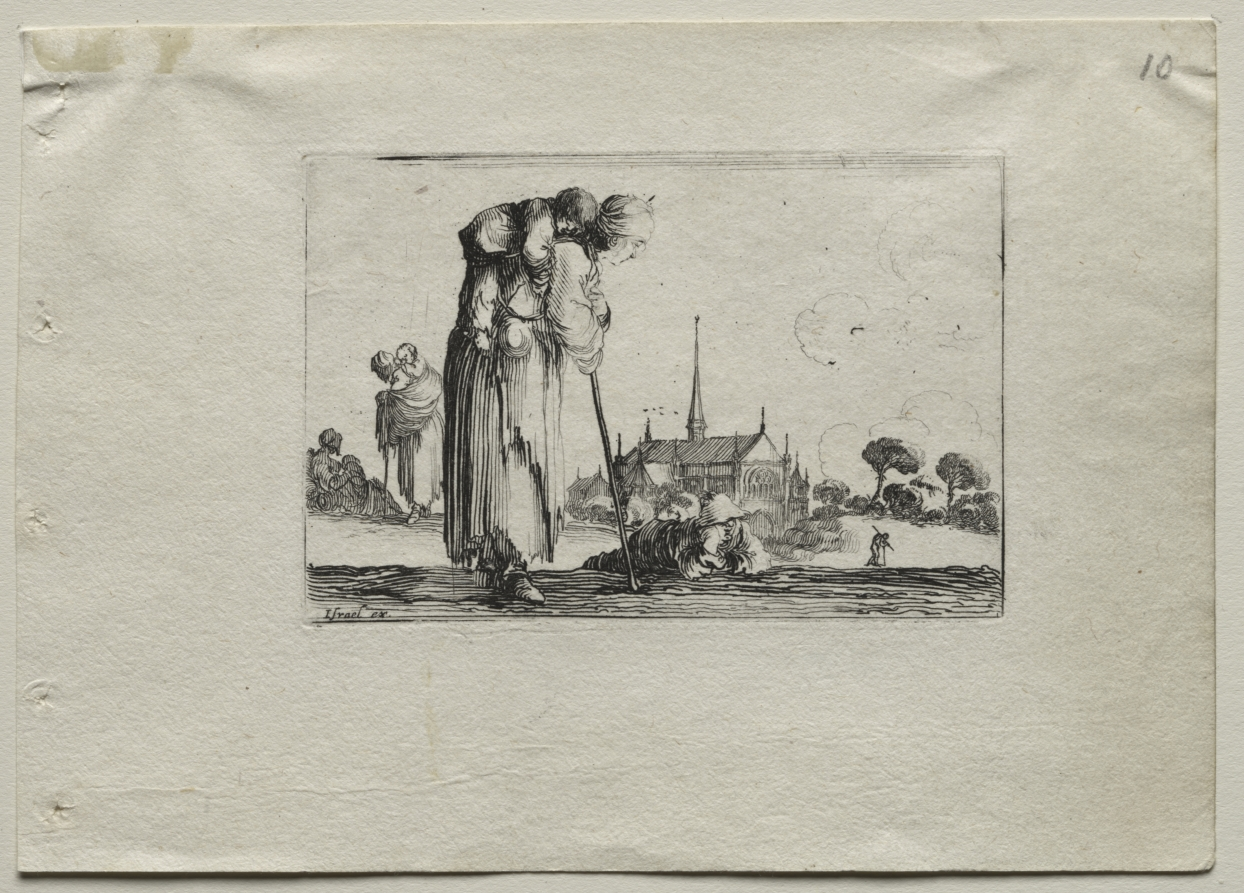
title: Caprices: Standing Beggar Woman Carrying a Child on her Back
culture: Italy, 17th century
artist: Stefano Della Bella (Italian, 1610–1664)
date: c. 1642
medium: etching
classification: Print